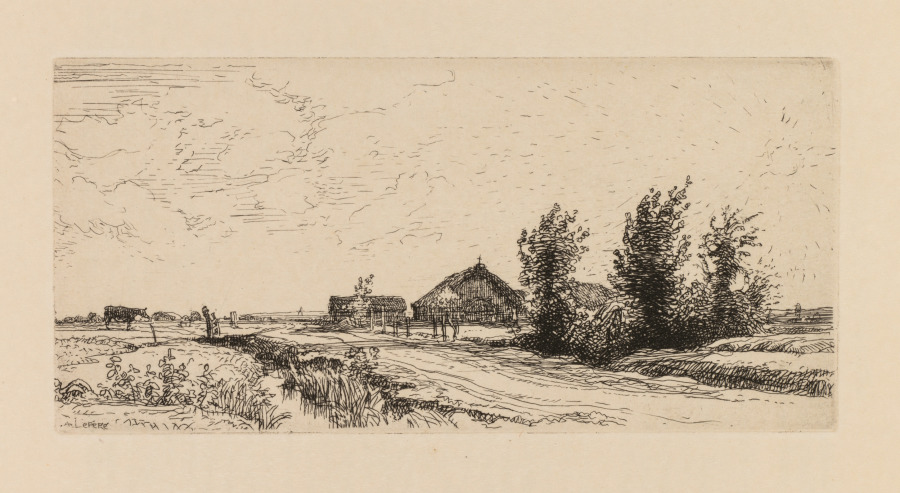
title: Auguste Lepère: Le petit gardeur de vaches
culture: France, 20th century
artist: Auguste Louis Lepère (French, 1849–1918)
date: 1931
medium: Etching, from bound volume with seven etchings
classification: Bound Volume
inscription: On tissue guard, lower right: 383. LE PETIT GARDIEN DE VACHES; On plate, lower left margin: A. Lepère